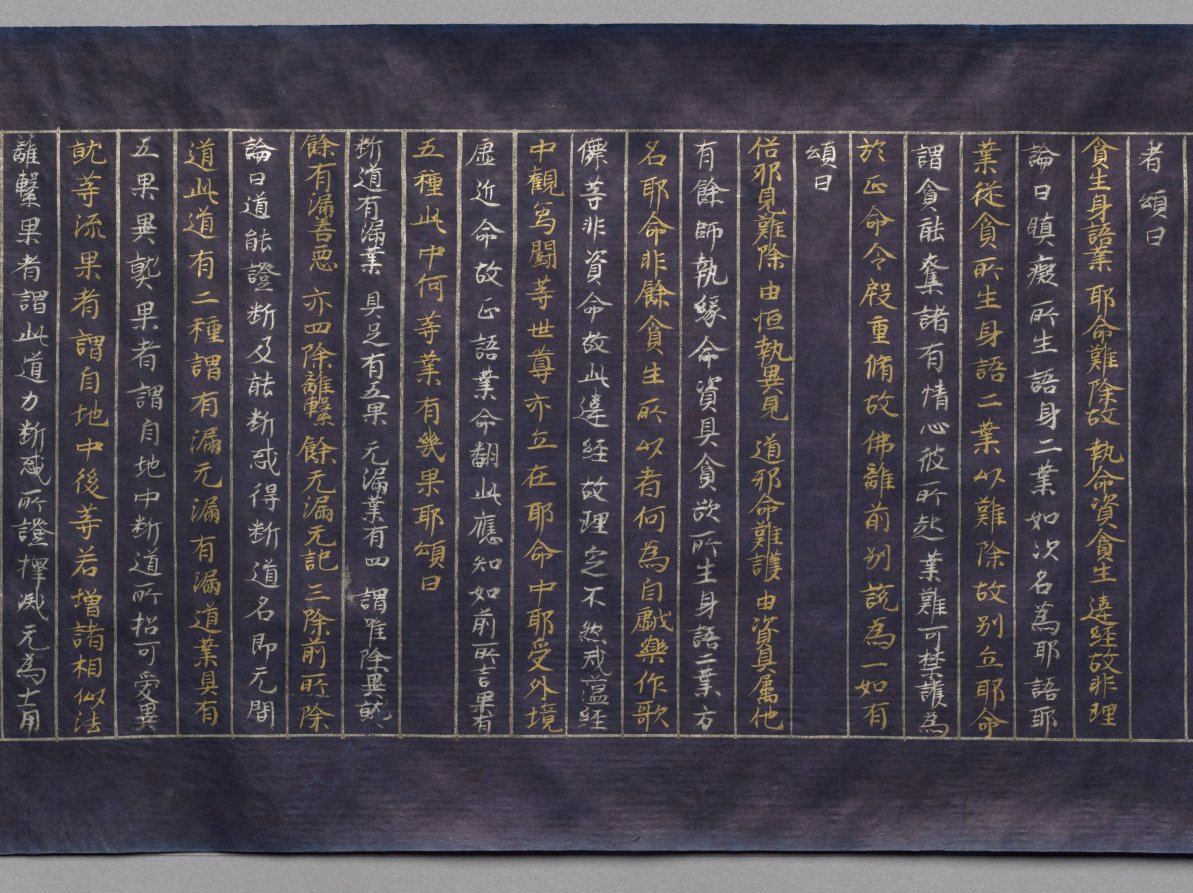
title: Meta-Discourse on the Teachings from the Treasury (Abidharmakosha-Bhashya)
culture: Japan, Heian period (794–1185)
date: 1100s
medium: handscroll; gold and silver on indigo-dyed paper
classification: Manuscript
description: This religious text relates some of the teachings of the great fourth-century Indian Buddhist scholar Vasubhandhu. The text analyzes human consciousness in its relationship to the environment and transformations that occur during meditation. This scroll is the 17th part of a 30-part translation of the text by Xuanzang, an eminent seventh-century Chinese monk.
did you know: The frontispiece depicts the Buddha Shakyamuni preaching in a paradisical landscape.